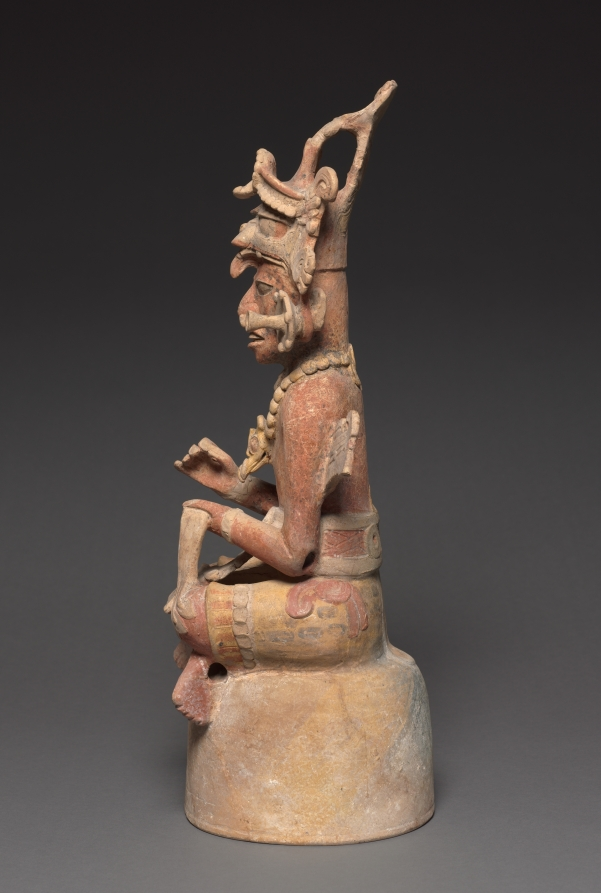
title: Artisan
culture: Guatemala, Petén region, Maya style (250-900), Maya style (250-900)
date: 250–600 CE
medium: earthenware with colored slips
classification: Sculpture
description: These figures represent the supernatural patrons of the visual arts and writing: the brothers Hun Batz and Hun Chuen ("One Monkey" and "One Artisan"). The two were refined artists but also bullies who tormented their younger brothers, who took revenge by transforming their elders into monkeys. Many Maya representations of the painter-scribes immortalize this fate by depicting the pair with both simian and human features, as here. The brothers are shown engaged in artistic or scribal pursuits. Sitting on high-domed bases that may have served as the lids of incense or offering bowls, each apparently once grasped a tool in his upper hand—for instance, a paint brush or a stylus for writing. In the lower hand, one cradles a small mask and the other, a piece of bark that likely refers to the beaten bark from which the Maya made books.